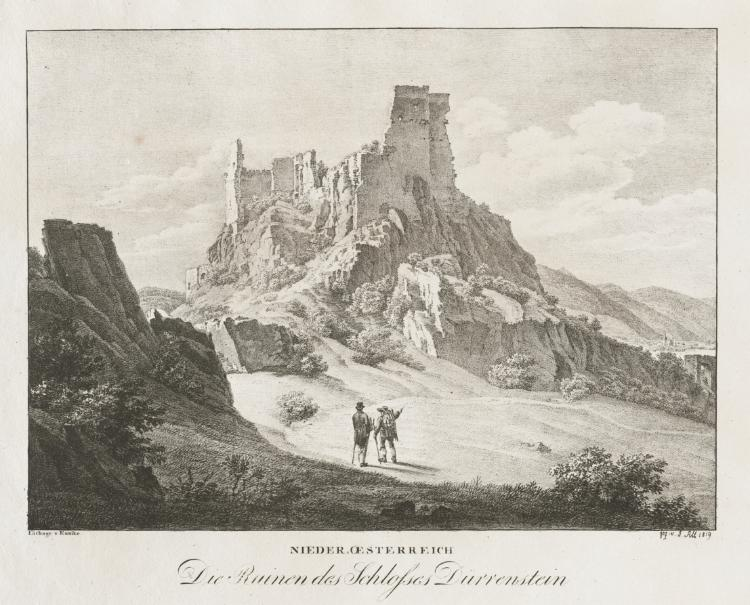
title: Nieder-oesterreich, Die Ruinen des Schlosses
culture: Austria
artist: Jakob Alt (Austrian, 1789–1872)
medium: lithograph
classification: Print